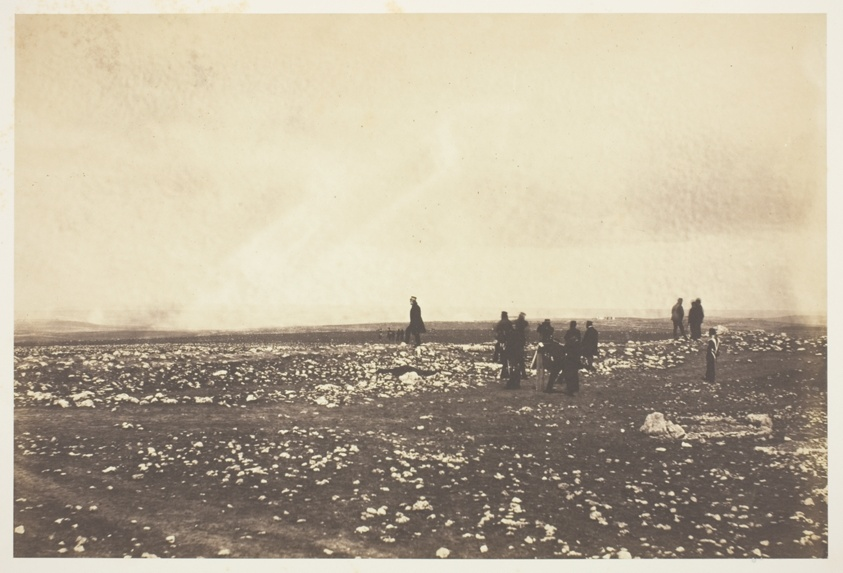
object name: Photograph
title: Officers on the Look out at Cathcarts Hill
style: 19th century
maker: Roger Fenton (English, 1819–1869)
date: 1855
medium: Salted paper print, from the album "Photographic Pictures of the Seat of War in the Crimea" (1856)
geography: England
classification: salted paper print; photographic process; photography; photograph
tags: Collected by Hugh Edwards